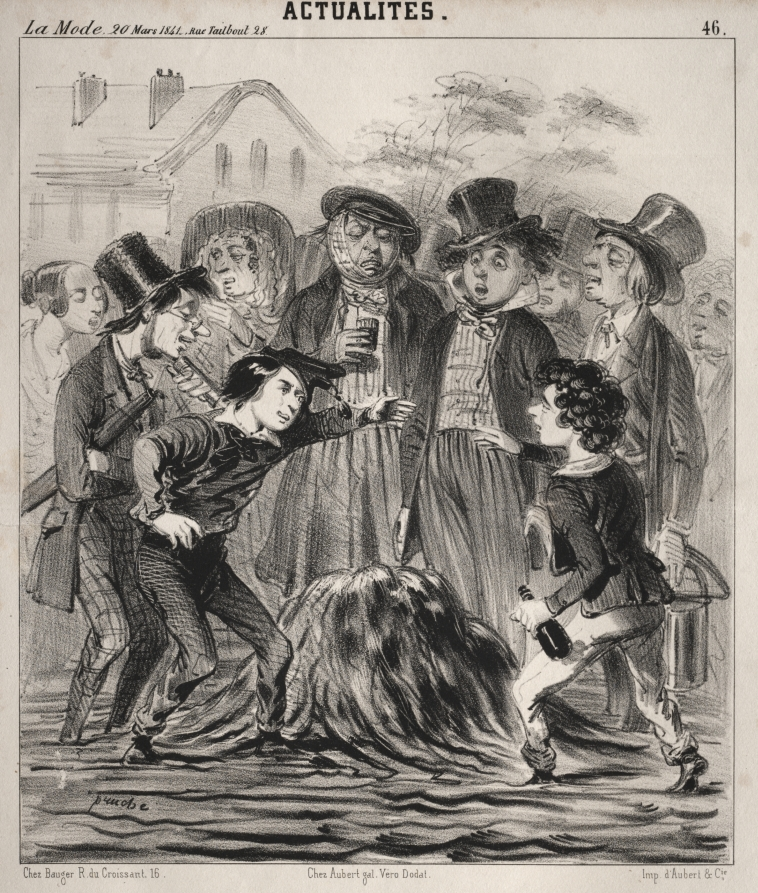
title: Actualitès: Ha hé Felix! arrive donc vite!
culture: France, 19th century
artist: Clémente Pruche (French, 1831–1870)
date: 1841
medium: lithograph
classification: Print